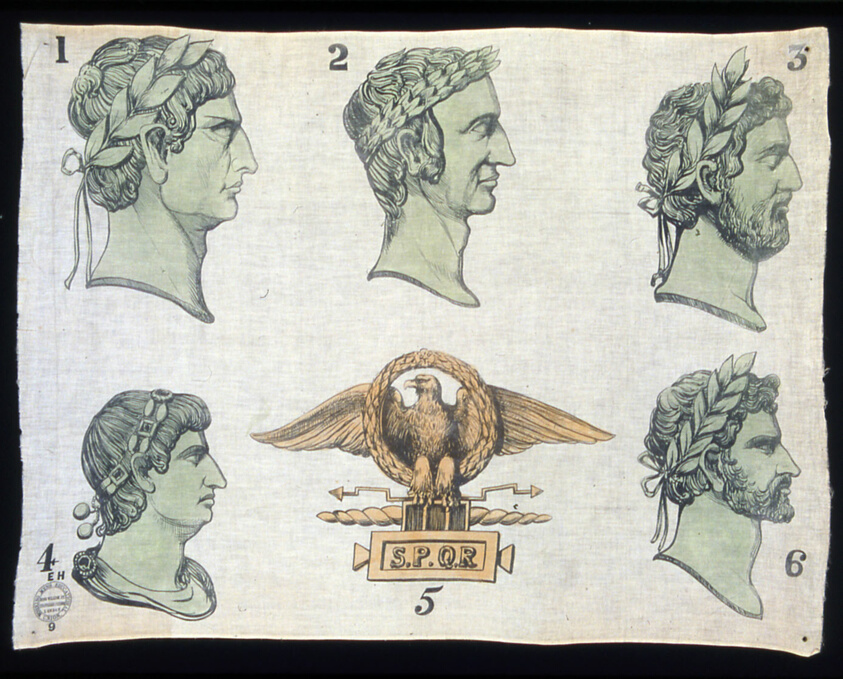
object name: Textile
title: Panel (Furnishing Fabric)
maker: England, London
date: c. 1850s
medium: Cotton, plain weave; block printed and painted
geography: London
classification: textile; weaving - printed; furnishing textile